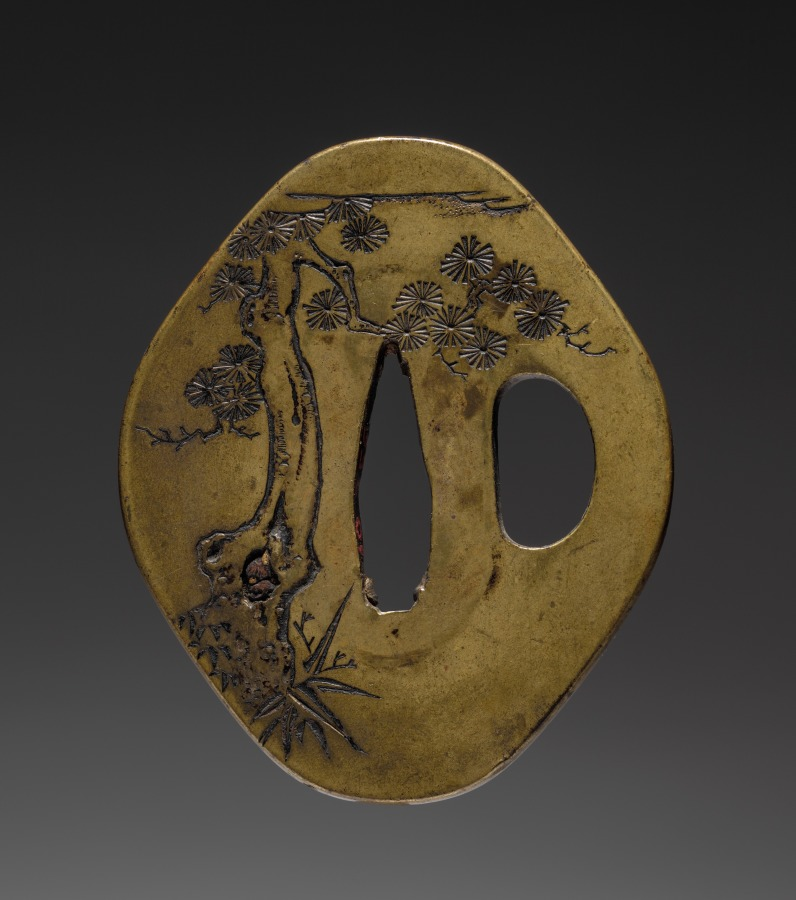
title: Sword Guard (Tsuba) with Zhong Kui (Shoki) the Demon Queller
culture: Japan, Edo period (1615–1868)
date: early 1800s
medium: iron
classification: Arms and Armor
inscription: signed: 知充作